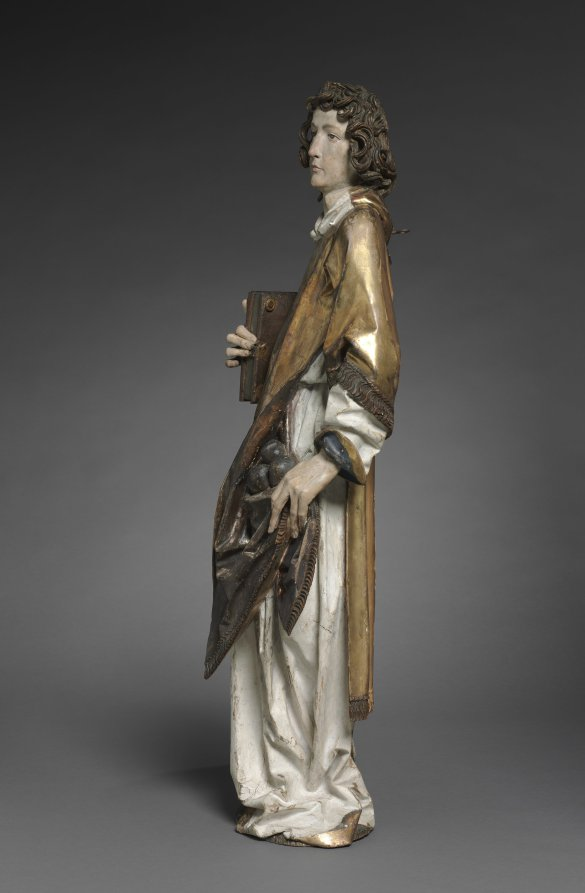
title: Saint Stephen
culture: Germany, Würzburg, 16th century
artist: Tilman Riemenschneider (German, active Würzburg, c. 1460–1531)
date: 1502–8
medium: lindenwood with polychromy and gilding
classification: Sculpture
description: This sculpture, along with that of Saint Lawrence (1959.42) and two others in Germany, are believed to be the remaining fragments of a large altarpiece carved by Riemenschneider for the Dominican convent in Rothenburg in Franconia (demolished in 1813). Saints Stephen and Lawrence both wear the dalmatic to indicate their status as deacons in the early church. Each holds a symbol of his martyrdom; here, Saint Stephen cradles some stones to indicate his death by stoning. Art in Germany through the early 1500s remained firmly anchored in the late Gothic style with its associated interests in realism. Riemenschneider was one of the most prolific and versatile sculptors of this style, a recognized master in both stone and wood. His flourishing workshop employed as many as 40 apprentices in sculpting, woodcarving, and painting. His sculptures are noted for the dreamy, melancholy, and introspective quality in their expressions, as well as their remarkable attention to detail.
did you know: Tilman Riemenschneider (c. 1460–1531) is probably the most famous German sculptor of the period around 1500.